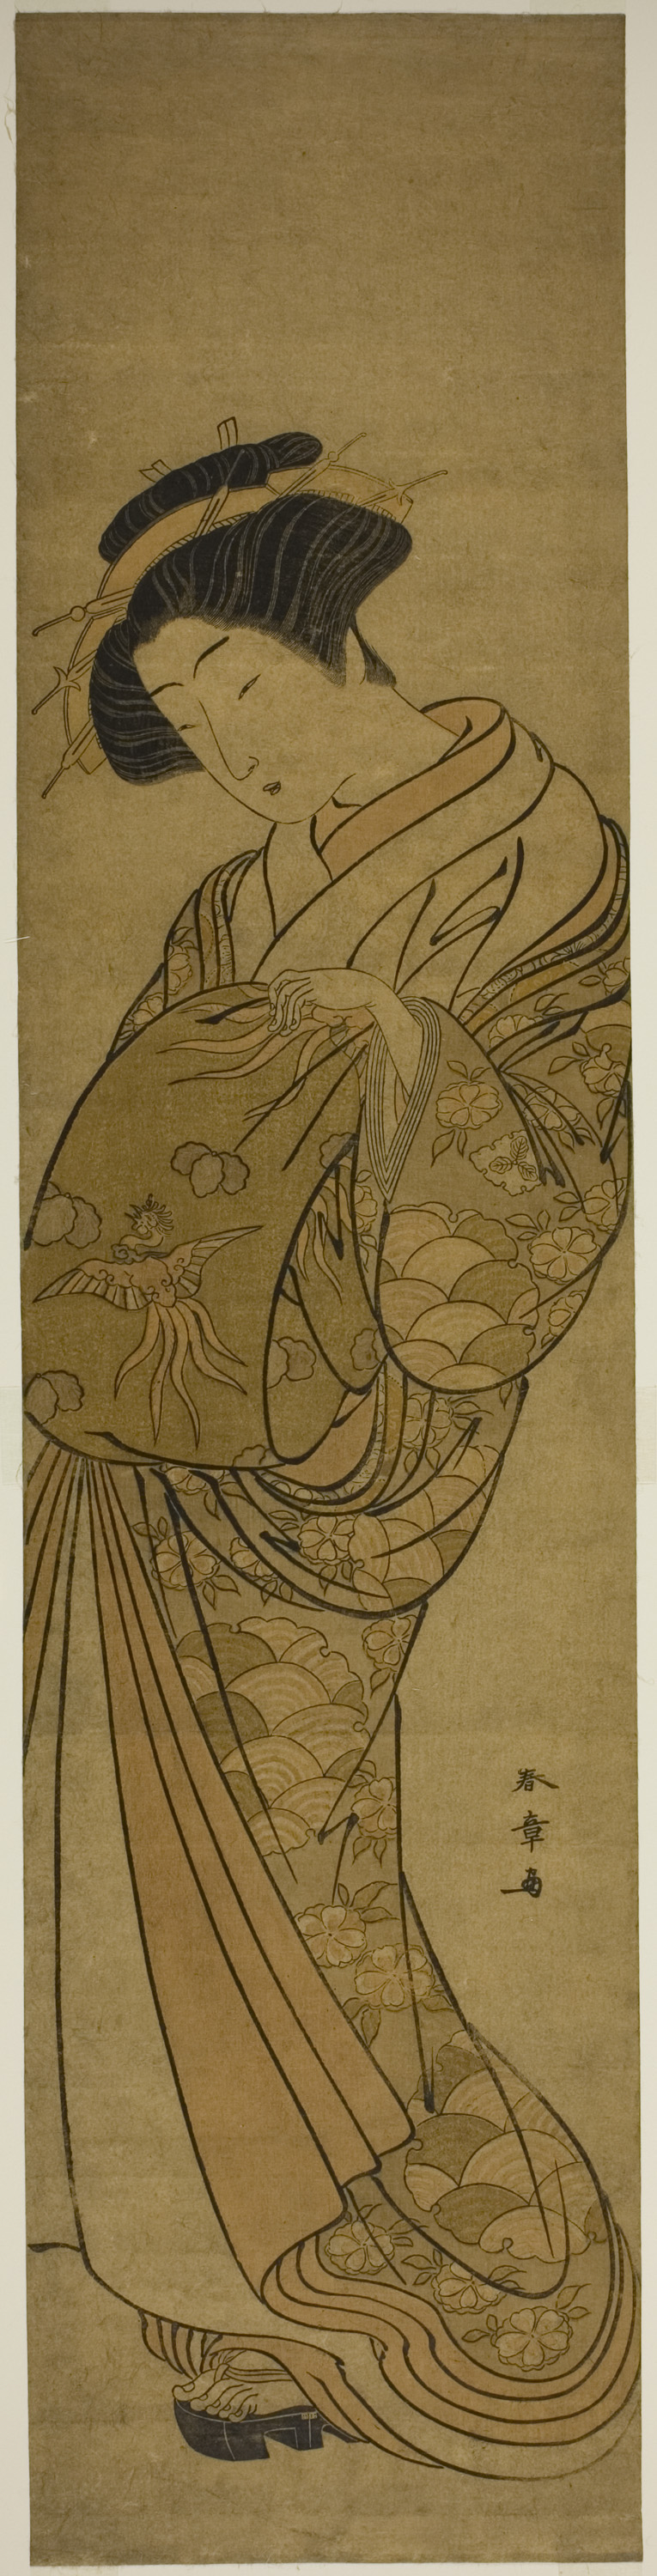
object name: Print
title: A Courtesan of the Matsubaya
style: Japanese (culture or style)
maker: Katsukawa Shunsho 勝川 春章; Japanese, 1726-1792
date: mid–late 1770s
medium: Color woodblock print; wide hashira-e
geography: Japan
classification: woodblock print; print; asian art